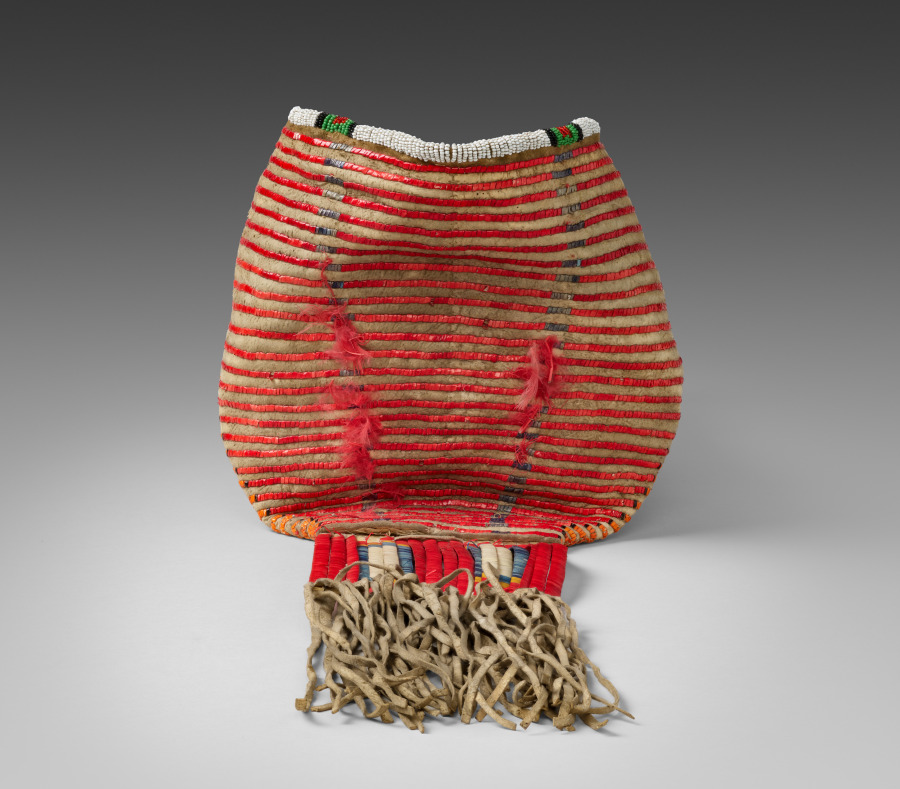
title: Cradle Board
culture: America, Native North American, Lakota (Sioux), Post-Contact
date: c. 1900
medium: leather, quills, beads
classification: Leather